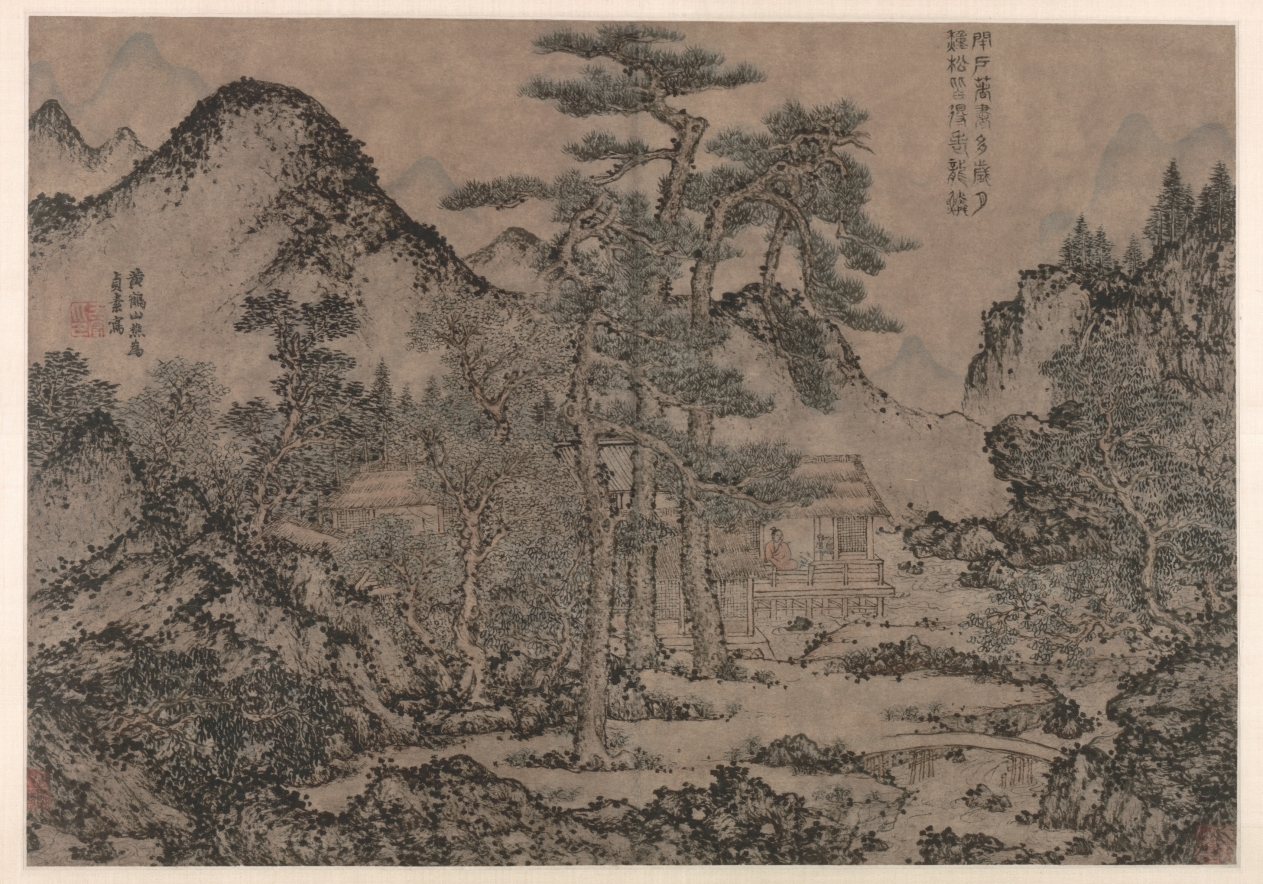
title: Writing Books under the Pine Trees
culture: China, Yuan dynasty (1271-1368)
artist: Wang Meng (Chinese, c. 1308–1385)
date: c. 1308–85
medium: Album leaf; ink and color on paper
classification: Painting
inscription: Artist's inscription, signature, and seal: Many years and months passed by the locked gate/ Behind which the scholar has been immersed in writing his books;/ While the pine trees he had planted/ Have all grown up with old dragon scales./ The Yellow Crane Mountain Woodcutter [Huang-ho-shan-ch'iao] painted this for Chen-su [the hao of Ts'ao Chih-po]. [seal] Wang Meng yin.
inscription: 2 additional seals: 1 of Ts'ao Chih-po (1271–1355); 1 unidentified.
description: Wang Meng, born into a distinguished family in Wuxing (modern Huzhou), Zhejiang province, was the maternal grandson of Zhao Mengfu (1254–1322). Aside from intermittent political commitments under the foreign Mongol and Ming governments, Wang dedicated most of his life to retirement, as conveyed in this painting. By the 1360s, when the Red Turbans began to rebel against the Yuan dynasty leaders, and the Mongols gradually lost control over Jiangnan, Wang Meng withdrew into the mountains north of Hangzhou, calling himself Woodcutter of Yellow Crane Mountain. In the early years of the Ming dynasty, Wang was caught up in a purge and died in prison.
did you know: Wang Meng wrote the inscription at the right in classical seal script and applied his signature and seal on the left side of the composition.